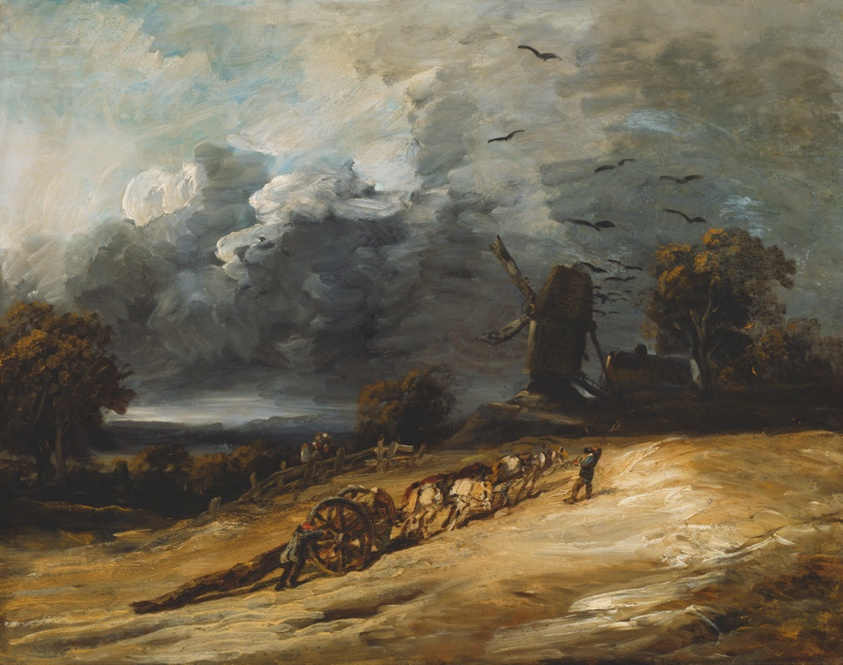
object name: Painting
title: The Storm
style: nineteenth century, 19th century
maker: Georges Michel (French, 1763-1843)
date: 1814/30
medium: Oil on panel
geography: France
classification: oil on panel; paint; oil paintings (visual works); french; painting; european painting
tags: storms, weather/seasons, clouds, windmill, trees, horse, horses, landscape, sky, men, man, wheel, fences, rural life, labor, work